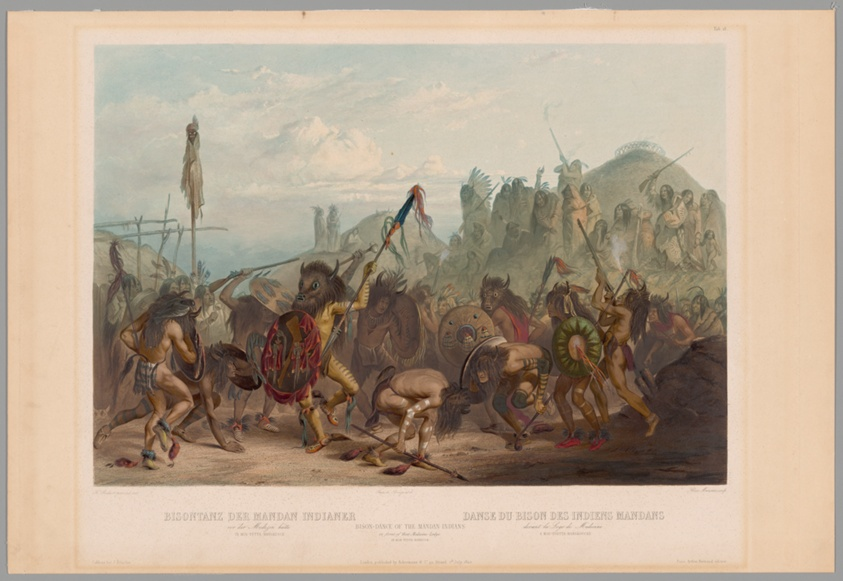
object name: Print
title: Bison-Dance of the Mandan Indians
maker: Alex Manceau (Swiss, 1817-1865); after Karl Bodmer (Swiss, 1809-1893)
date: 1842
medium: Hand-colored etching and aquatint, with opaque white watercolor and selective glazing, on ivory wove paper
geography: Switzerland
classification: print; paper; prints and drawing; aquatint; etching